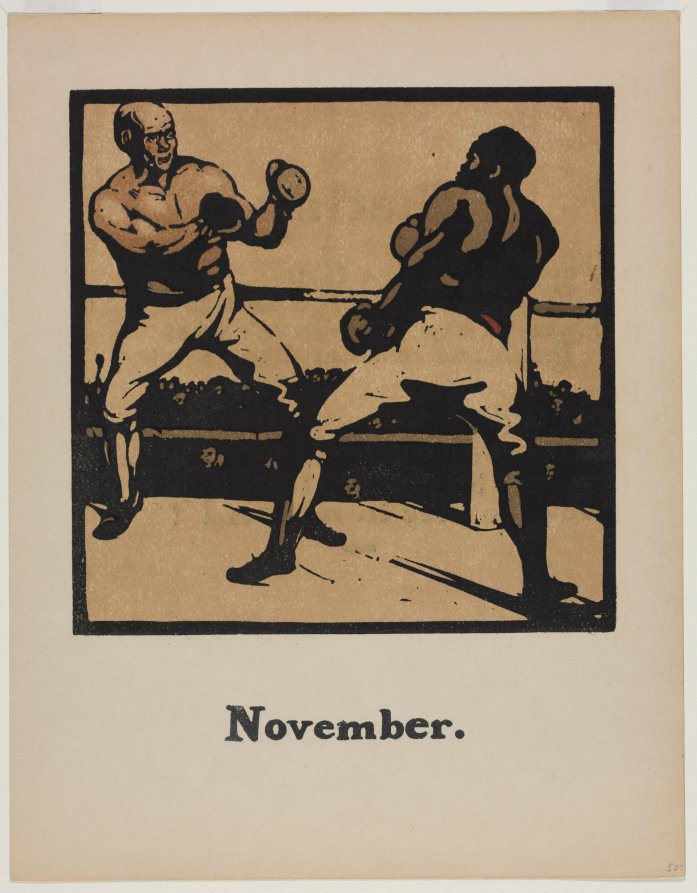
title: An Almanac of Twelve Sports: Boxing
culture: England, 19th century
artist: William Nicholson (British, 1872–1949)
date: 1897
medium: lithograph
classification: Print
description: The series An Alphabet was a popular and critical success, as was Nicholson’s second project for the publisher William Hienemann, An Almanac of Twelve Sports. Nicholson made woodcuts of traditional British athletics and pastimes, depicting an activity appropriate to the month it illustrated. Critics found that An Almanac of Twelve Sports offered something new—a pleasing combination of modern style and wholesome content and an “Englishness” that was greatly appreciated. The public agreed and the Almanac quickly sold out.